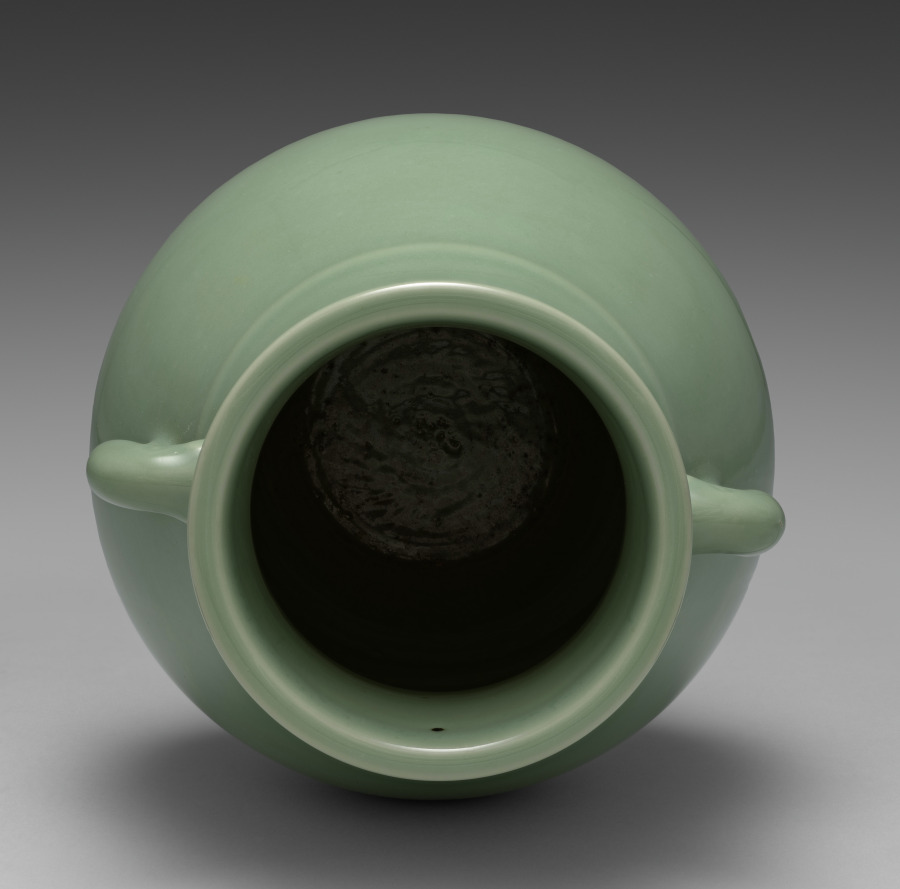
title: Hu-Shaped Vase with Handles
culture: Japan, Taishō period (1912–26) or Shōwa period (1926–89)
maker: Seifū Yohei IV (Japanese, 1872–1951)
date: 1914–46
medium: Porcelain with molded and carved design and green glaze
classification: Ceramic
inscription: 清風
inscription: 成山清風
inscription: 清風造【印】清風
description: Many of the vases created by Yohei III and IV were made with reference to and in emulation of Chinese ceramics in both form and glazing. The Seifu studio was inspired by later Chinese copies of two other archaic vessel types, the hu (Japanese ko) and guan (Japanese kan). In simple terms, in their original contexts, the hu and guan were storage jars that also appeared in ritual contexts. This hu-form vase by Yohei IV has a green glaze and handles in the shape of an elephant head. The details of the elephant heads are quite easy to miss, but a close look reveals that each has carved eyes with pupils defined, tiny ears and tusks in very low relief, and a curved trunk with the end curled up. This sort of container is even known as the “elephant ear” type. The only other decorative element on the vase’s pear-shaped body is a raised cordlike band around the shoulders.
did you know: The handles are shaped like elephant heads.